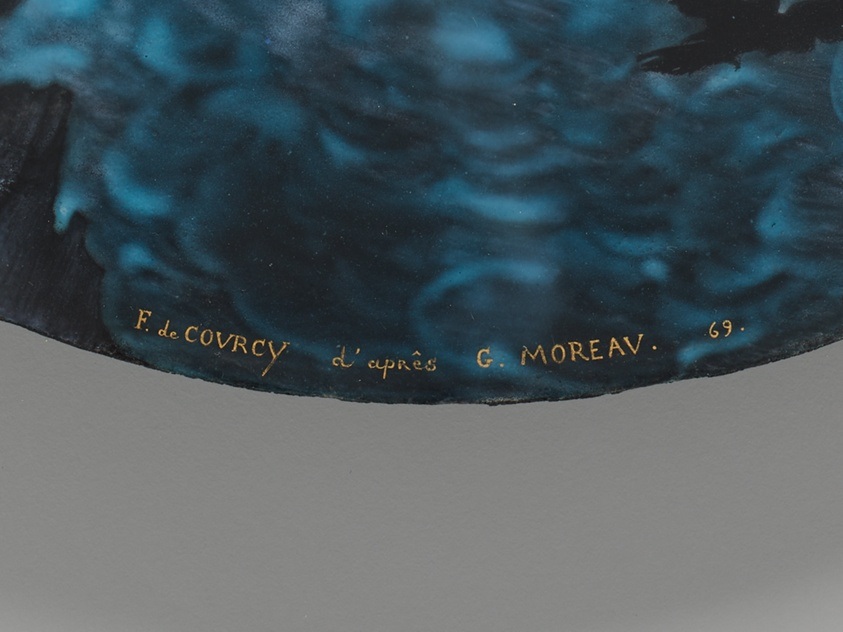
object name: Mixed Media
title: Chimera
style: nineteenth century, Symbolism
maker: Frédéric Charlot de Courcy (French, 1832–1886); After Gustave Moreau (French, 1826–1898)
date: 1869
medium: Enamel on copper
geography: France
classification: enamel; copper; metal; france; french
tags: Chimera, cliff, horse, man, woman, drapery, mythical, nudes, blue